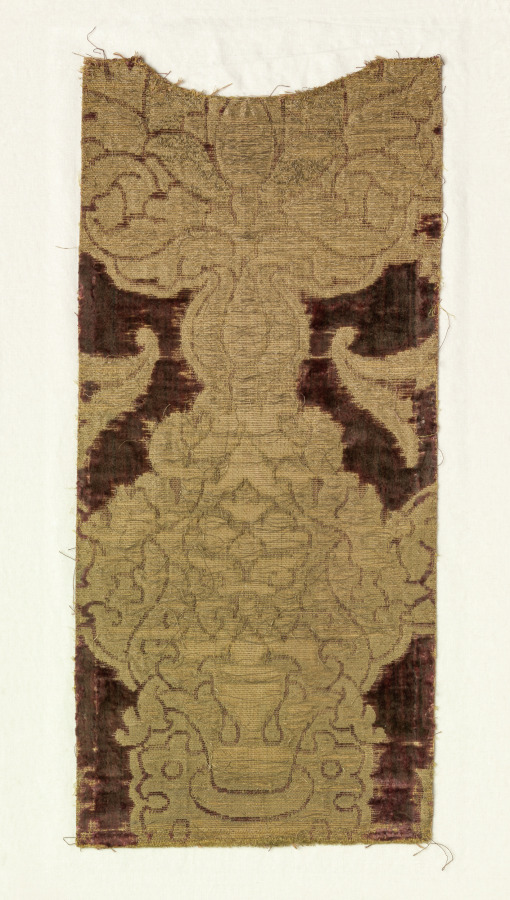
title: Fragments from Chasuble Front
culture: Italy, early 16th century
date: early 1500s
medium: velvet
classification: Velvet